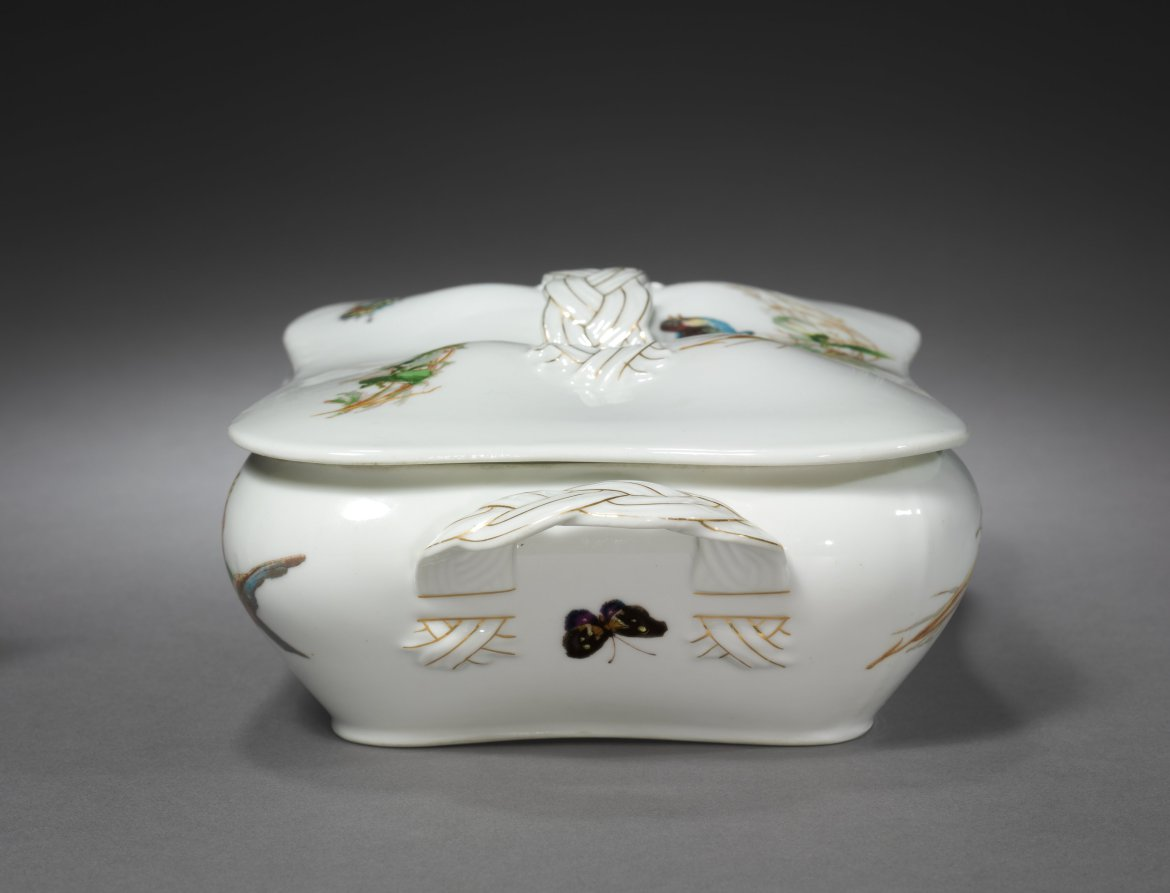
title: Covered Vegetable Bowl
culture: France, Limoges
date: c. 1890–1910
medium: porcelain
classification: Ceramic